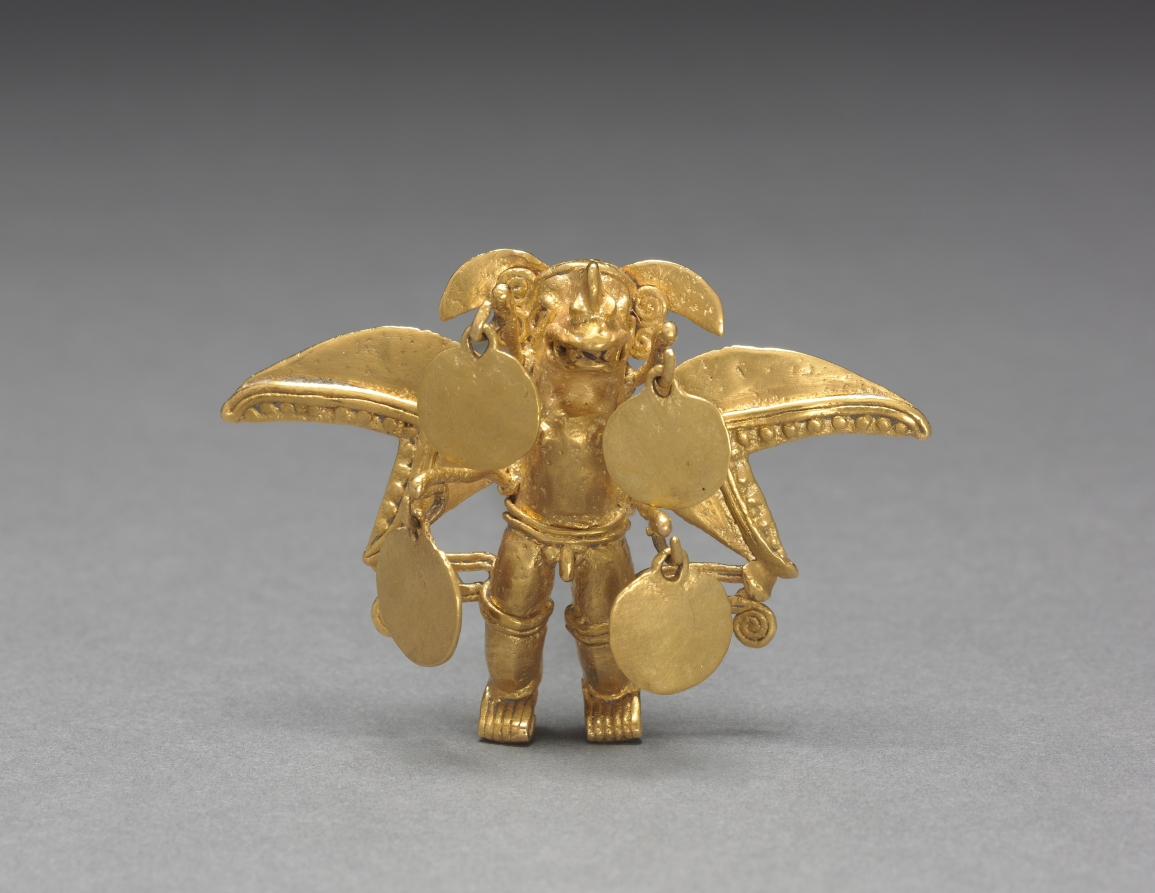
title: Winged Figure Pendant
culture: Southern Costa Rica, (Diquís Region), Diquís Style, 11th-16th century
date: c. 1000–1550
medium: cast and hammered gold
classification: Metalwork